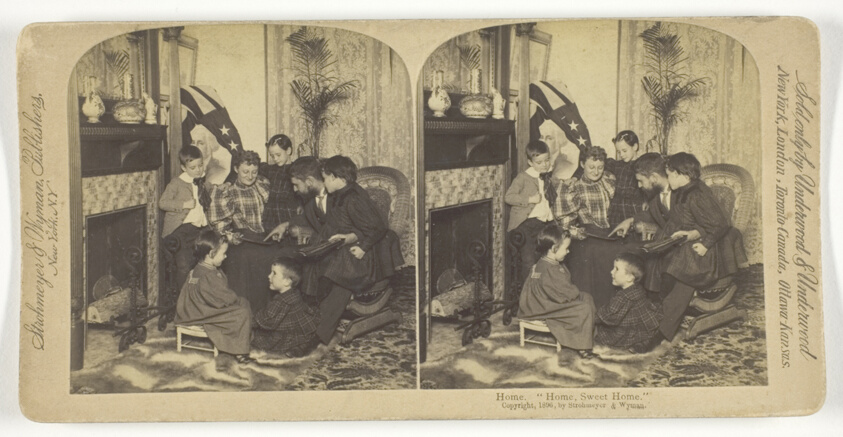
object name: Photograph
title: Home, Sweet Home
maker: Underwood & Underwood (American, active 1881-1920)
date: 1896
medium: Albumen print, stereo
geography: New York City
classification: photography; photograph